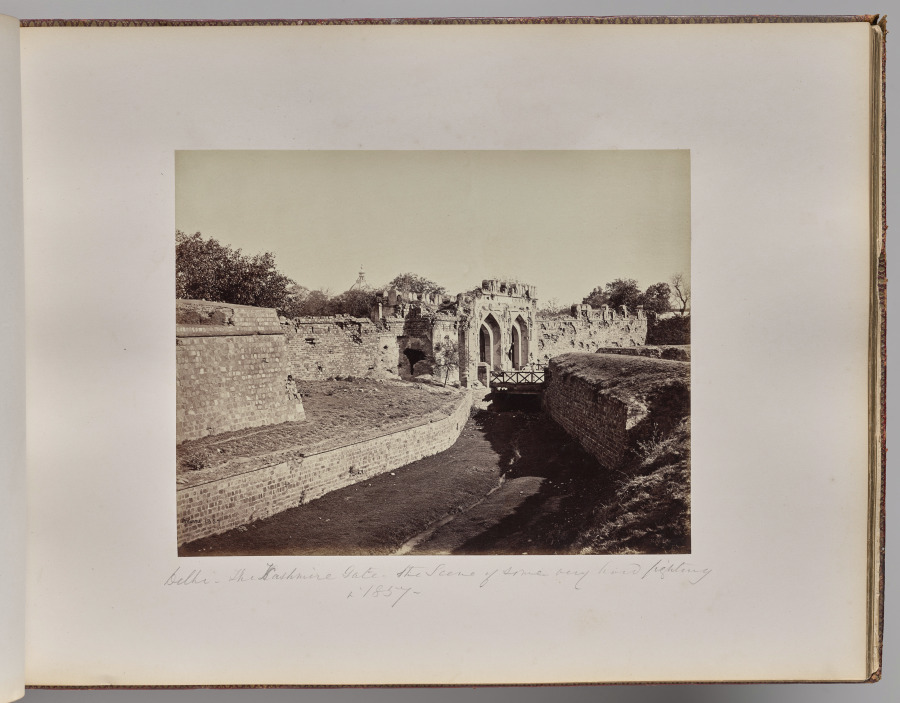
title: Delhi. The Kashmire Gate. The Scene of Some Very Hard Fighting in 1857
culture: England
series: Photographs of Northern India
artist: Samuel Bourne (British, 1834–1912)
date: 1863–70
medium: albumen print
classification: Photograph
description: The 50 images in this album, all taken in the 1860s, move from the hill towns of the Himalayas down to cities including Lahore (now in Pakistan), Delhi, Lucknow, Agra, Benares (now Varansi), and Calcutta (now Kolkata). Architectural studies of major monuments offer valuable historical records of what sites such as the Taj Mahal and the imperial mosque of the Mughal emperors in Delhi looked like before 20th-century restorations.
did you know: Samuel Bourne, the author of most the images in this album, was a banker in England before he moved to India to become a professional photographer.